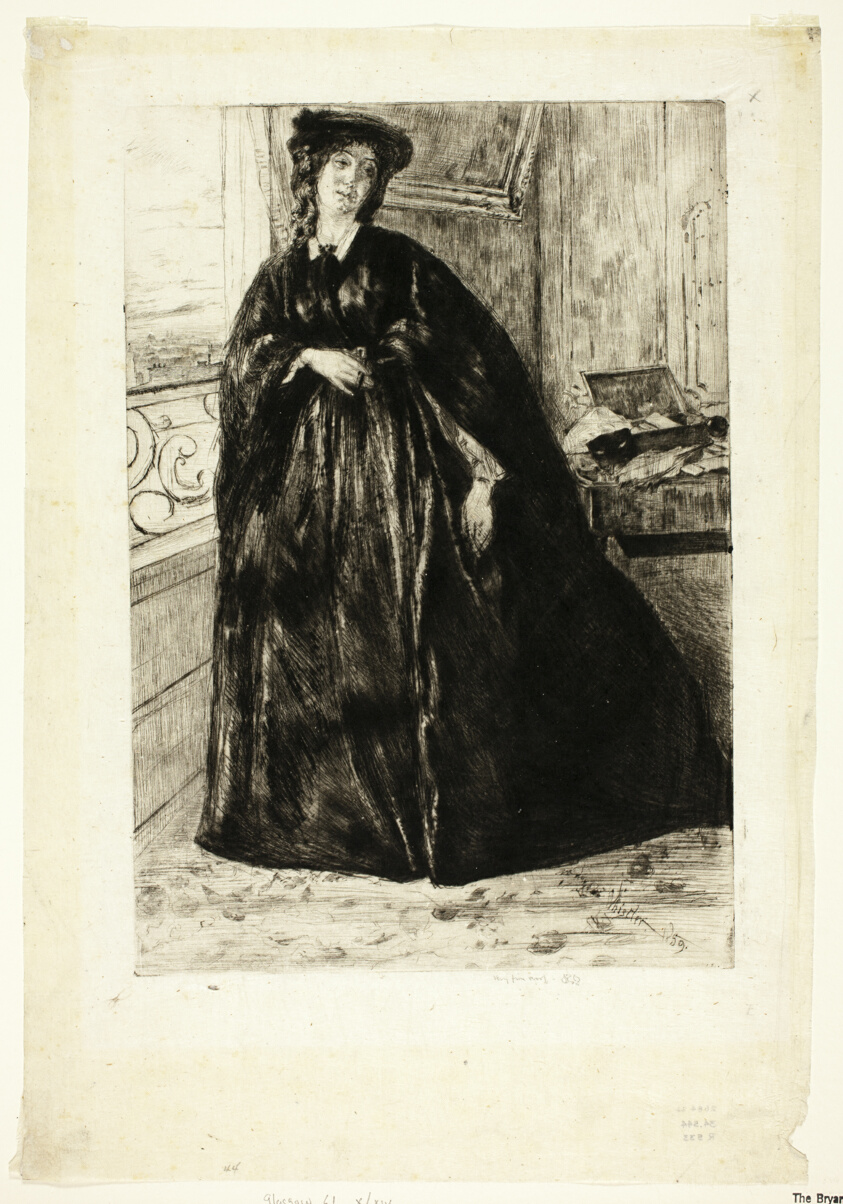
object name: Print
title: Finette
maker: James McNeill Whistler (American, 1834-1903)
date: 1859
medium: Etching and drypoint in black on ivory Japanese paper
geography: United States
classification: etching; foul biting; drypoint; print; prints and drawing; paper